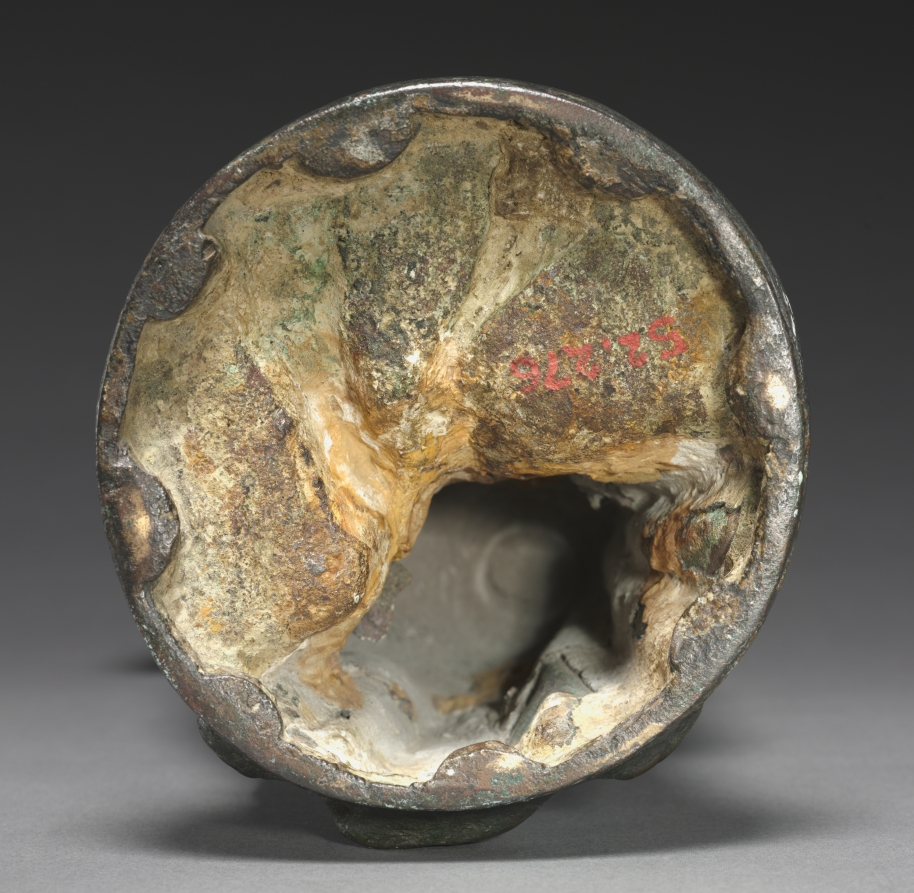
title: Saint John the Baptist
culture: Italy, Verona, 16th century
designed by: Angelo de Rossi (Italian)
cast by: Giuseppe de Levis (Italian, 1605)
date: late 1500s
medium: bronze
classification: Sculpture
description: Saint John wears the hair shirt he fashioned during his retreat into the wilderness to live humbly. He clenches a device of baptism, a shell to pour the water.